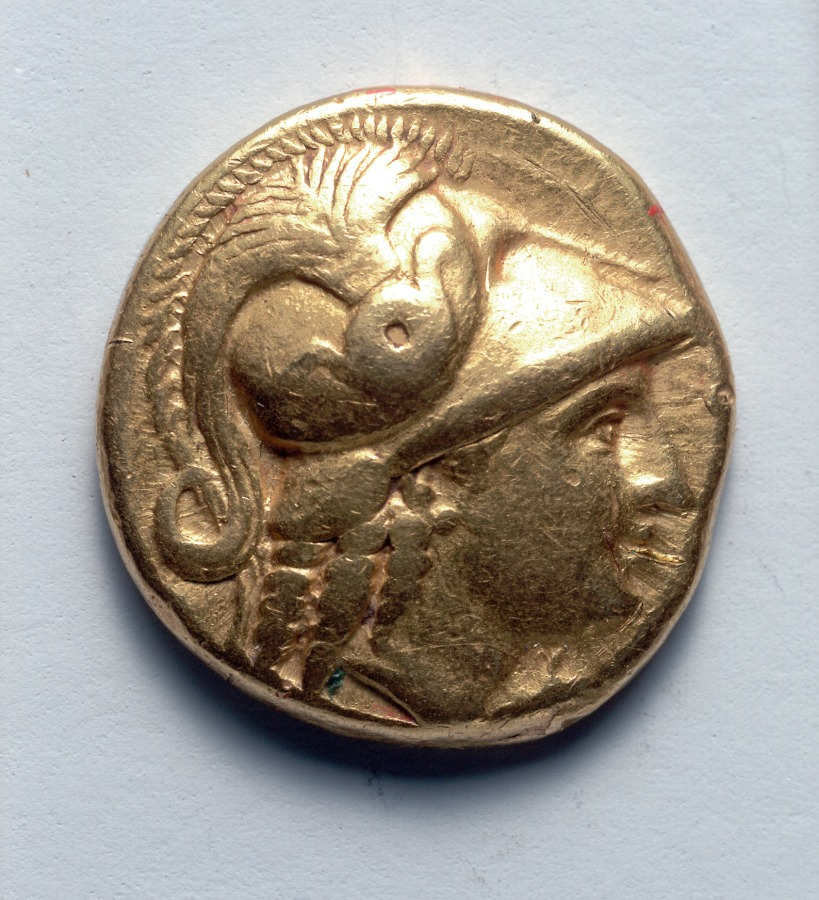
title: Stater: Head of Athena (obverse); Nike (reverse)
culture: Greek, Macedonian, minted at Abydos (Egypt), reign of Alexander III [The Great}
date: 336–323 BCE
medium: gold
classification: Coins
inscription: [ΑΛ]ΕΞΑΝΔΡΟ[Υ]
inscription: Δ within Π